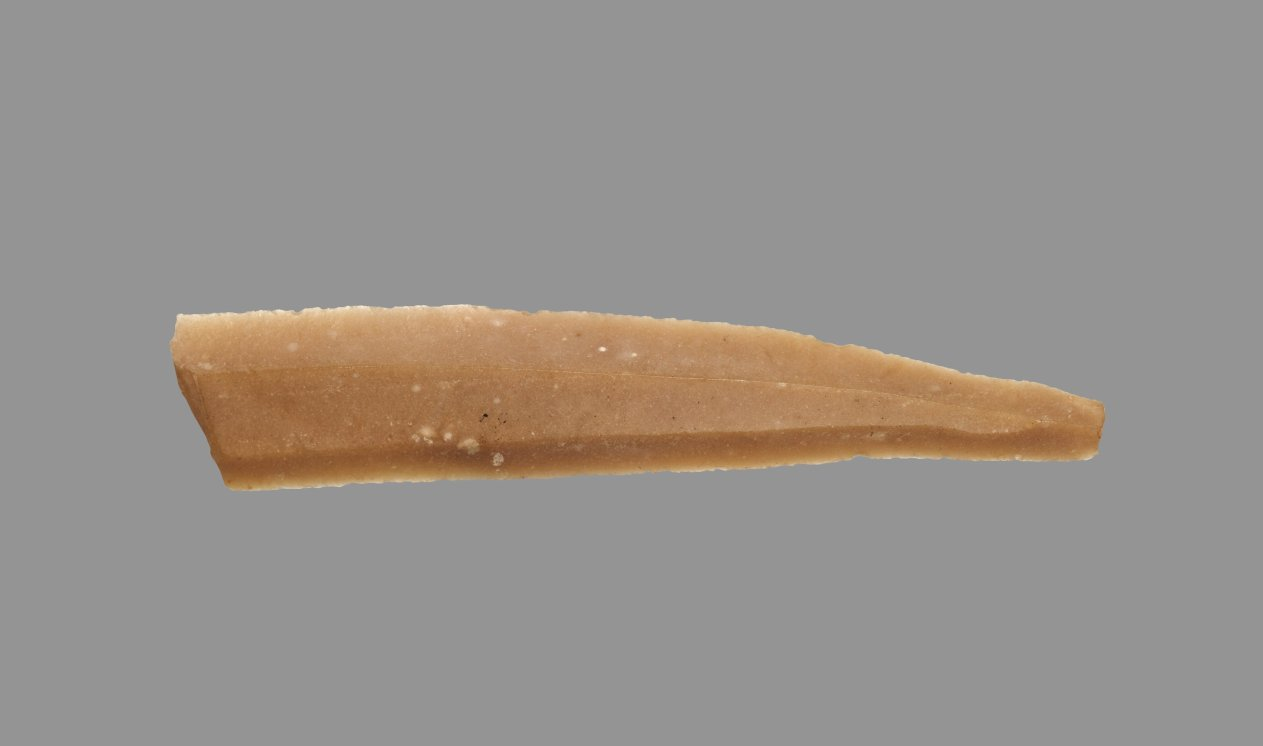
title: Sickle Blade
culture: Egypt, Middle Kingdom (2040–1648 BCE), Dynasty 12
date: 1980–1801 BCE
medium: flint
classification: Implements